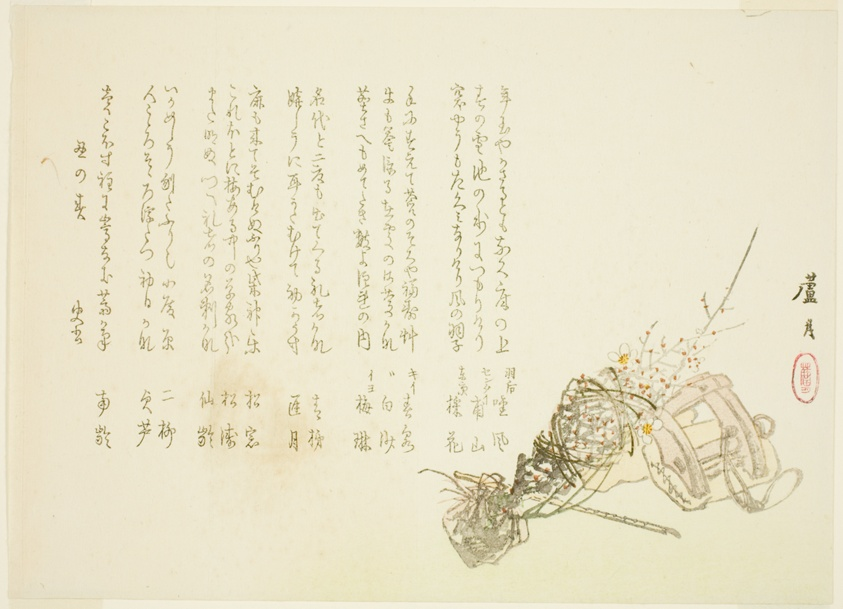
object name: Print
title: Bundled plum blossom branches and pack-horse saddle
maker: Yoshimi Rogetsu (Japanese, 1808-1909)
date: c.1877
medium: Color woodblock print; surimono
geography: Japan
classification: print; asian art